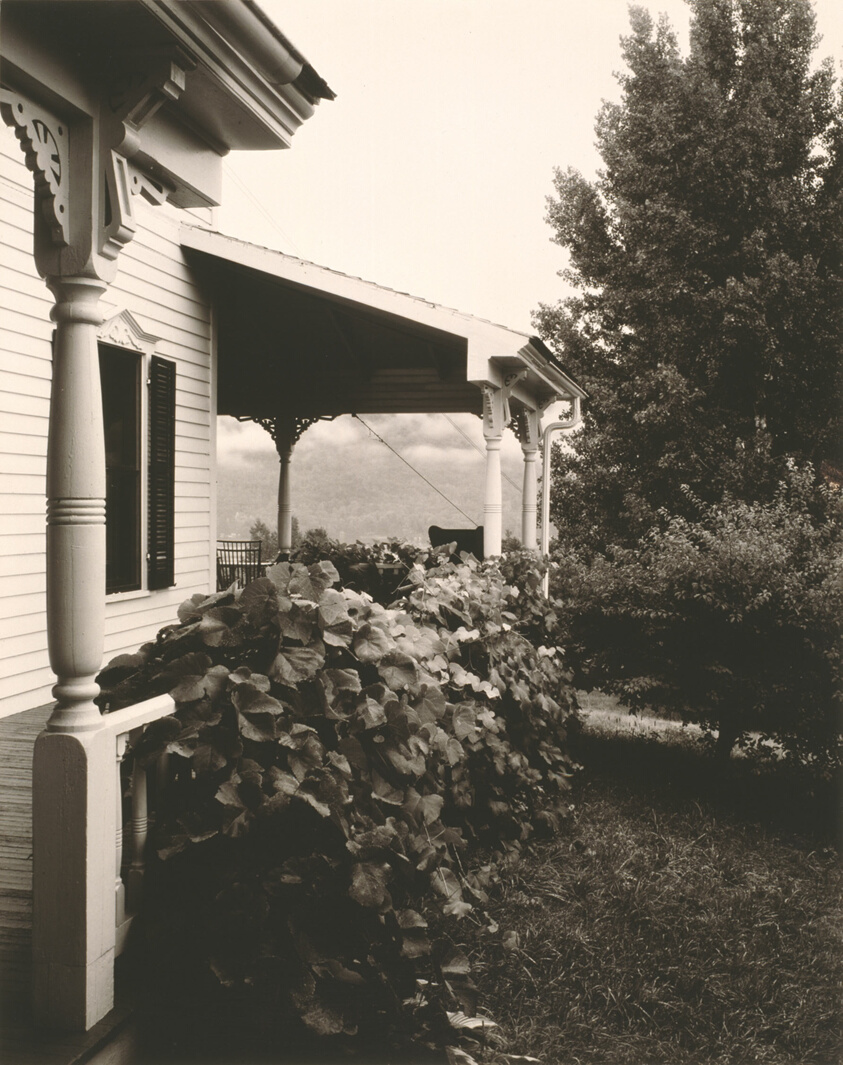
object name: Photograph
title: House and Grape Leaves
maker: Alfred Stieglitz (American, 1864–1946)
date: 1934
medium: Gelatin silver print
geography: United States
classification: gelatin silver (developing-out-paper) pr; photographic process; photography; photograph